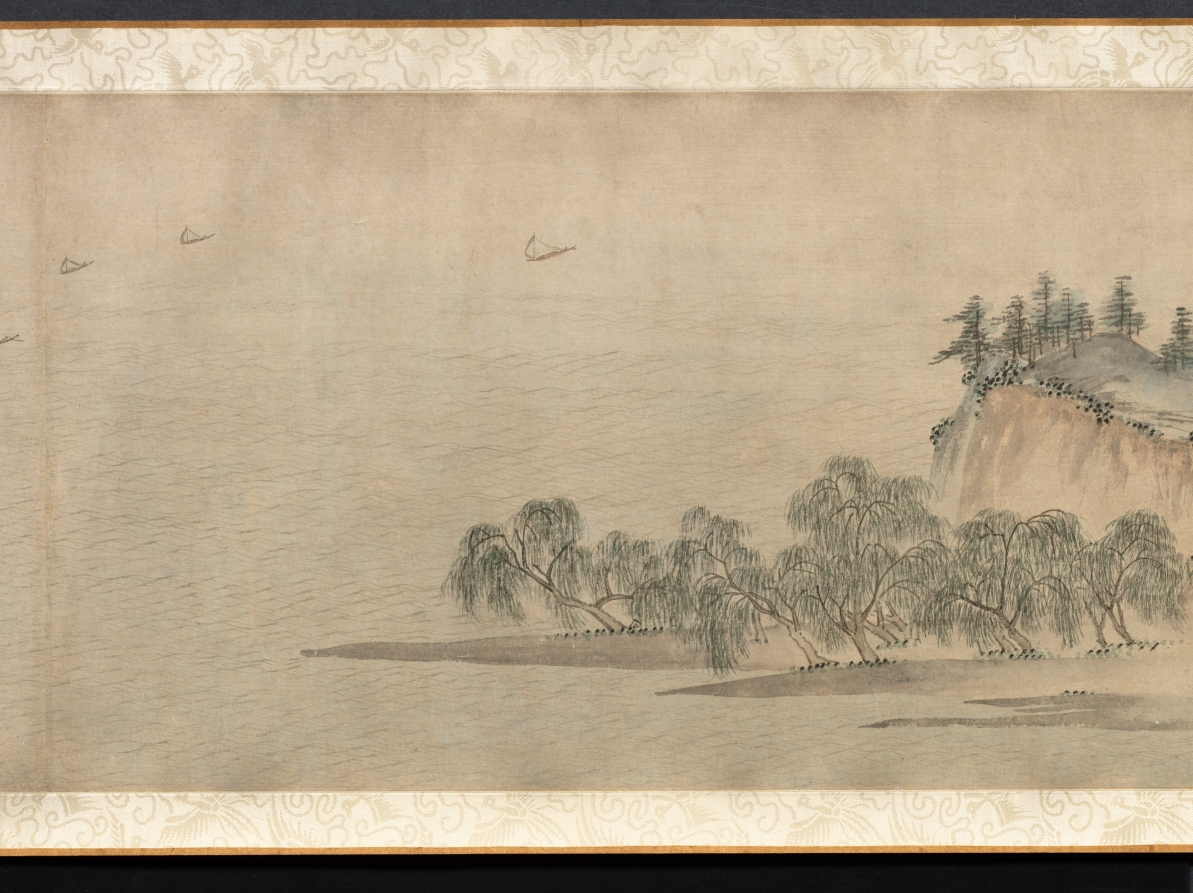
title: Ten Thousand Li of the Yangzi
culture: China, Ming dynasty (1368–1644)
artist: Dai Jin (Chinese, 1388–1462)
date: c. 1400s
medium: Handscroll; ink and color on paper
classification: Painting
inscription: Two colophons at end. Artist's seals: Dai Jin 戴進 and Wenjin 文進.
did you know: Dai Jin is traditionally considered the founder of the Zhe School, a style of landscape painting.